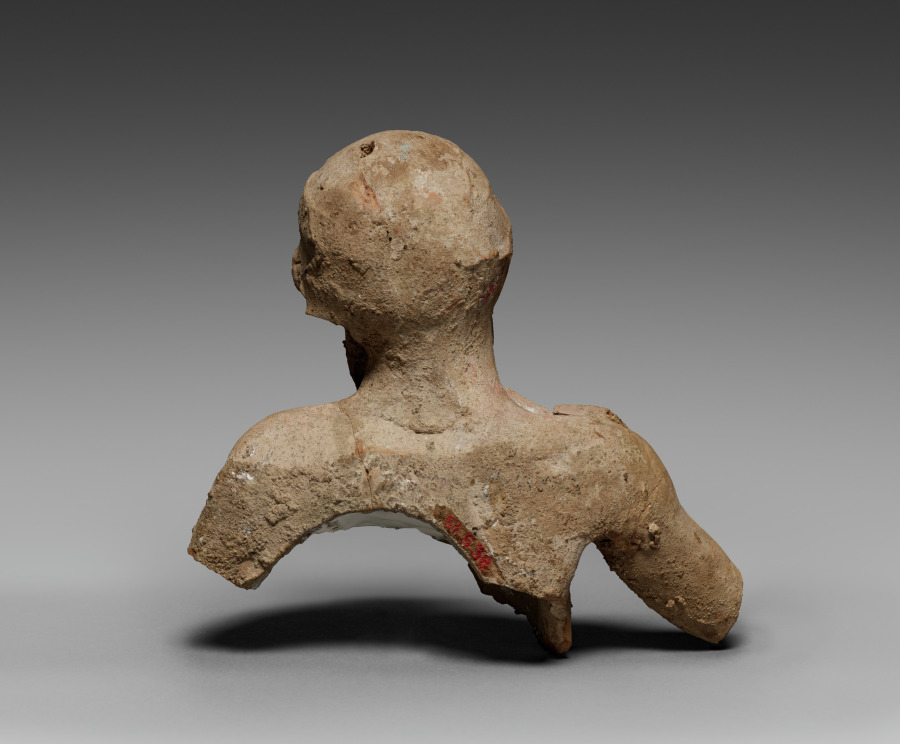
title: Fragment of a Reclining Male Figure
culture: Greek/South Italian, Taranto (ancient Taras)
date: 450–350 BCE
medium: terracotta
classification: Sculpture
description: This terracotta figure depicts a bearded man with his head tilted toward his left shoulder, suggesting that he is reclining. At Greek banquets, the attendees reclined while eating. Banquet imagery was very popular, including in the Greek colonies in Italy. This man likely originally had an elaborate headdress separately made and attached over the smooth part of the head. The clay on the figure’s right shoulder is probably the remains of “ribbons” attached to his headdress. There are traces of red pigment in the hair.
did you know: Tarantine terracotta banqueters were made from molds, with additional handmade details.